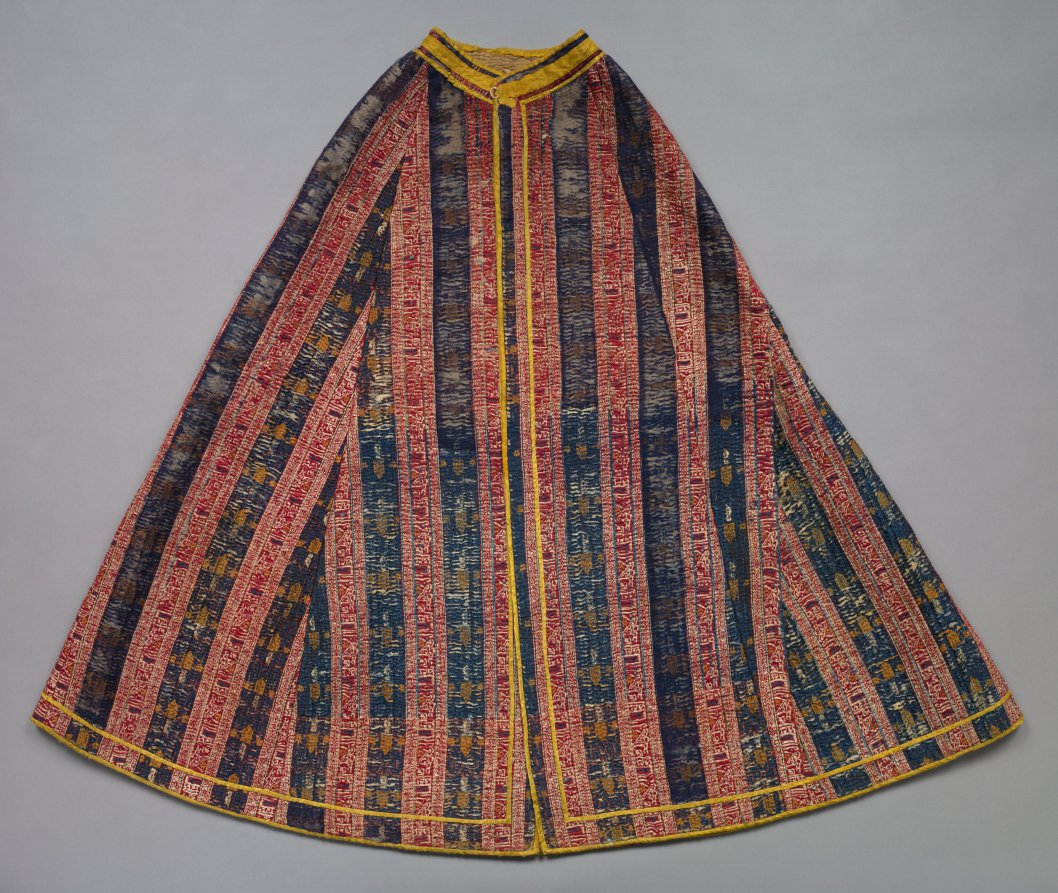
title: Mantle for a statue of the Virgin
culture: Spain, Granada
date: late 1400s–1500s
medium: Silk: lampas weave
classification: Textile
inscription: on red ground is Naskhi inscription "Glory to our Lord, the Sultan" in white.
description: A striped silk textile, probably made for use in the Islamic Alhambra palatine complex, was turned into a mantle for a statue of the Virgin Mary. On the crimson stripes the salutation that occurs as ornamental text throughout the Alhambra, Glory to our Lord the Sultan, repeats in Arabic script.